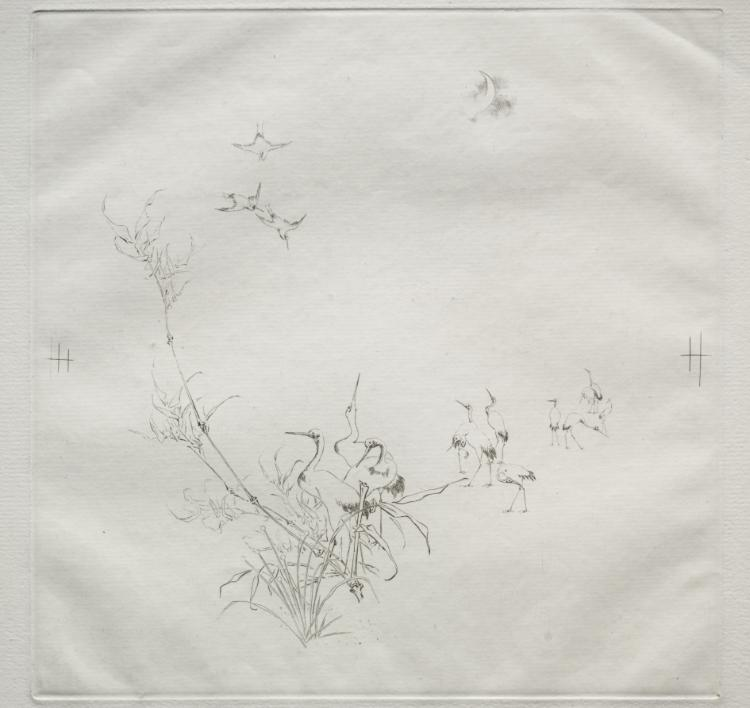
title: Parisian Service (Haviland service): The Moon (no. 5)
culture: France, 19th century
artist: Félix Bracquemond (French, 1833–1914)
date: 1875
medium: etching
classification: Print